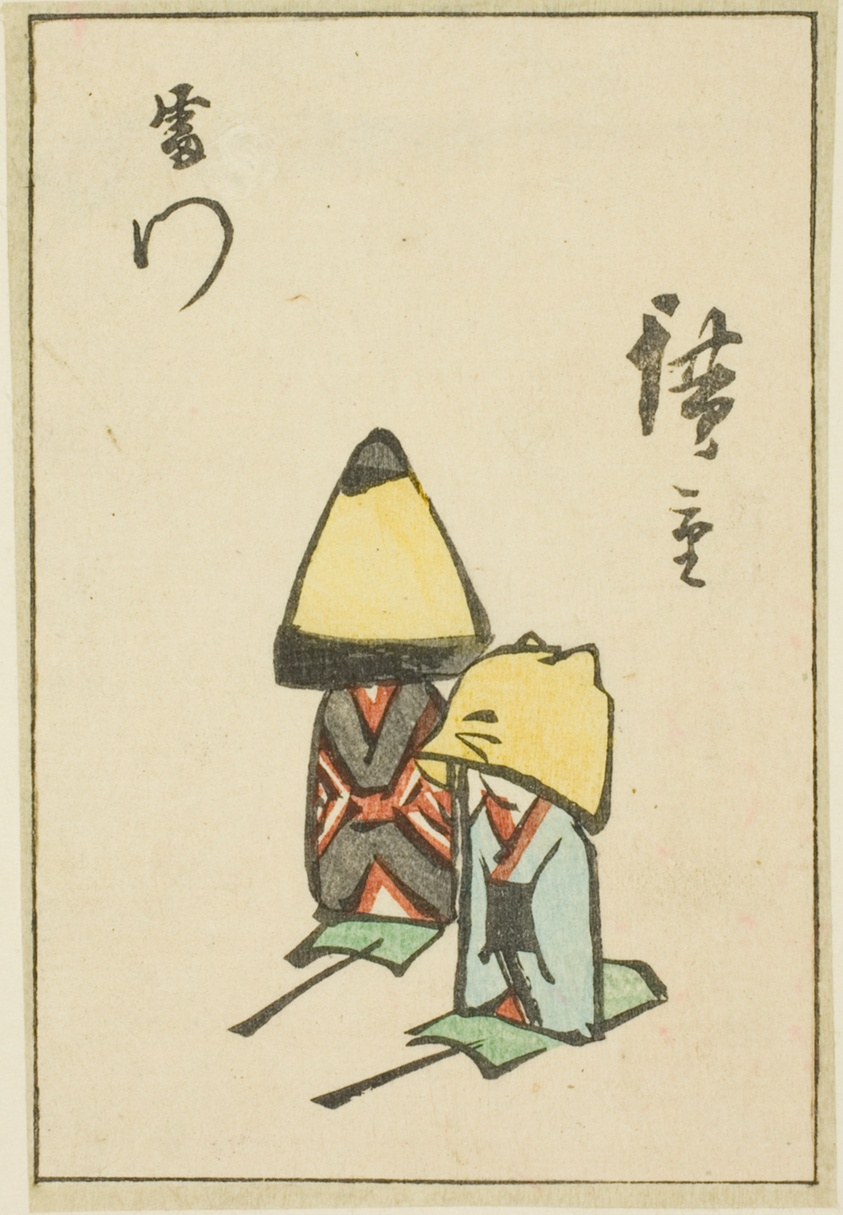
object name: Print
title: Thunder Gate (Kaminarimon), section of a sheet from the series "Cutout Pictures of Famous Places in Edo (Edo meisho harimaze zue)"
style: Japanese (culture or style)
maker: Utagawa Hiroshige 歌川 広重; Japanese, 1797-1858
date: 1857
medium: Color woodblock print; section of harimaze sheet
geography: Japan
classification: woodblock print; print; asian art